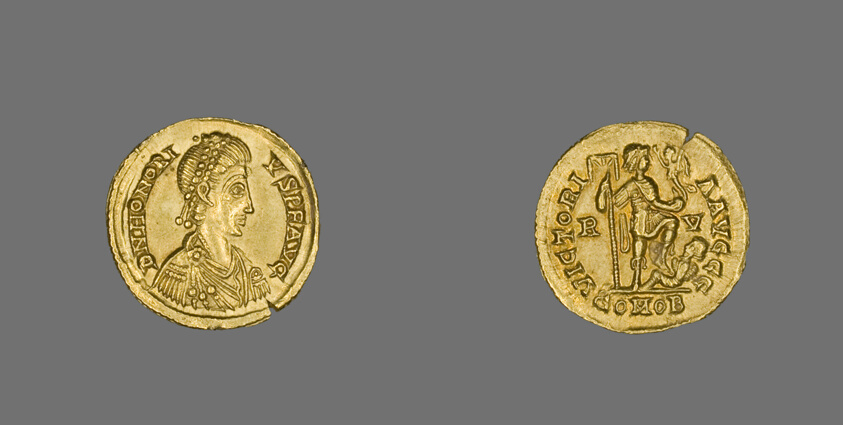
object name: Coin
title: Solidus (Coin) of Honorius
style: byzantine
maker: Byzantine, minted in Ravenna, Italy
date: 405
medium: Gold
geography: Ravenna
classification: coin; ancient art